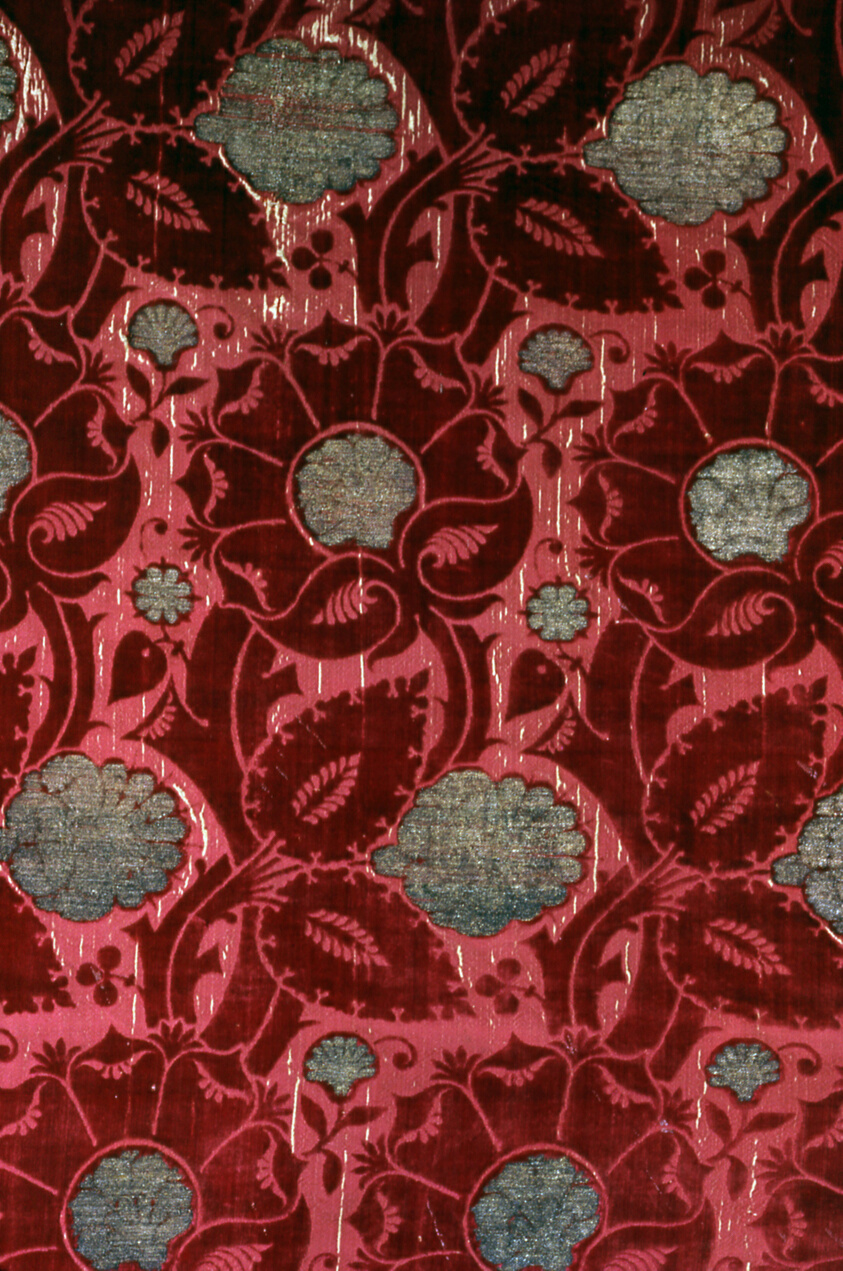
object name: Religious/Ritual Object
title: Cope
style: 15th century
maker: Italy, probably Venice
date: 1460-70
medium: Silk and gilt-metal-strip-wrapped silk, warp-float faced 4:1 satin weave with supplementary brocading wefts bound by main warps in weft-float faced 1:4 'S' twill interlacings and with supplementary pile warps forming cut voided velvet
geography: Venice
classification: weaving - velvet; liturgical; textile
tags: vestments, botanical/floral, flowers, foliage, fruit, pomegranates